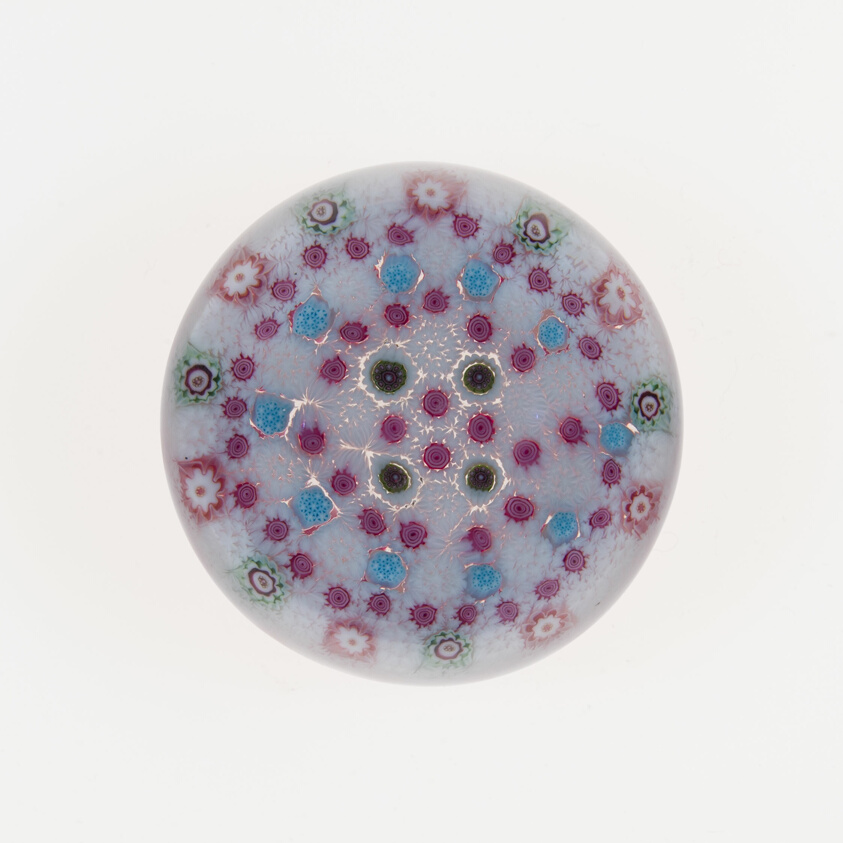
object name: Glass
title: Paperweight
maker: Clichy Glassworks (Cristalleries de Clichy); Clichy, France, 1837-1885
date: c. 1845–60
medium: Glass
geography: Clichy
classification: paperweight; glass